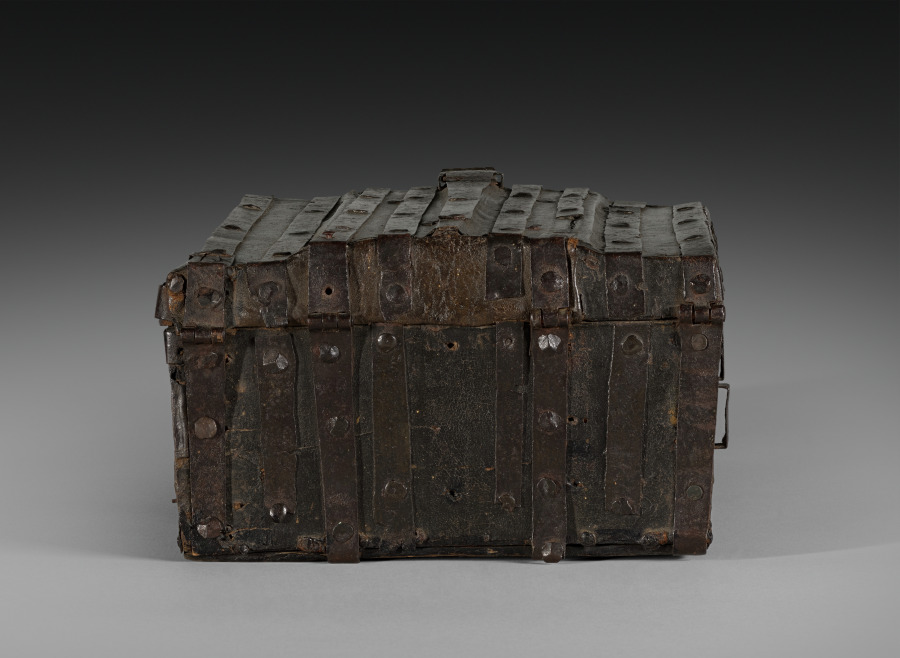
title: Coffret with Woodcut of Saint Veronica's Vernicle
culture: Coffret: France, probably Paris; Woodcut: Germany, Augsburg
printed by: Hans Burgkmair the Elder (German, 1473–1531)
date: Coffret: c. 1515; Woodcut: c. 1509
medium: Wood, leather, iron, textile, woodcut with stenciled coloring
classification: Print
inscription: SALVE. XPI. EFFIGIES. SACERRI[M]A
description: This remarkable object is thought to have functioned as a traveling case to keep small valuables and books, as well as a provisional altar. Made in France around 1515, the interior lid is affixed with a devotional woodcut made in Germany, imported, and colored for the purpose. Featuring an image of the veil of Saint Veronica, the text at the bottom of the woodcut guides the user in prayer to the holy image of Christ’s face which has been miraculously imprinted on the veil, an action that held promise of indulgences (a reduction in one’s punishment for sins). Presumably, the owner carried the box on a journey, retrieved a prayer book from inside, and propped it open in order to practice daily prayers.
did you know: A secret compartment on the top lid of this coffer may have held a relic, consecrated host, or valuable document.